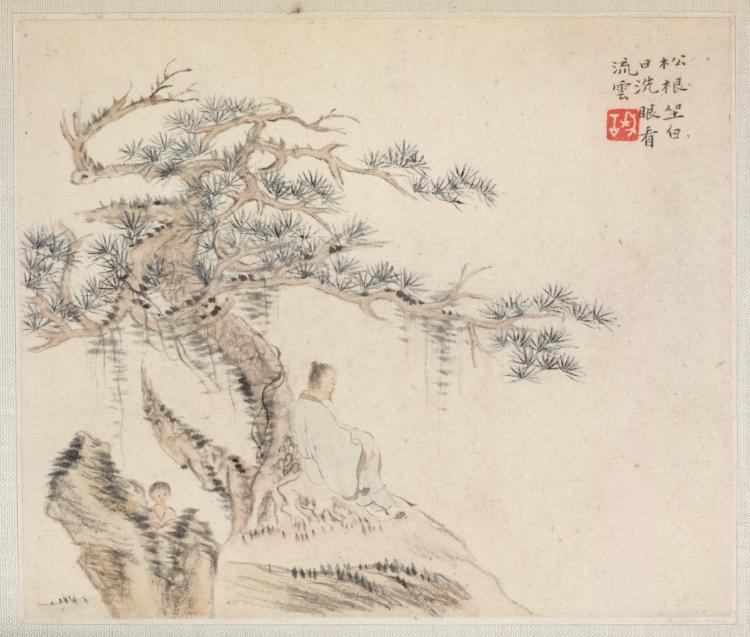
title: Album of Landscape Paintings Illustrating Old Poems: Scholar under a Pine Tree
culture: China, Qing dynasty (1644–1911)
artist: Hua Yan (Chinese, 1682–c. 1765)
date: 1745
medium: album leaf, ink and light color on paper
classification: Painting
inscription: In the daytime, I sit on the root of a pine tree, I wash my eyes to watch the floating clouds." not signed, with a seal of the artist.